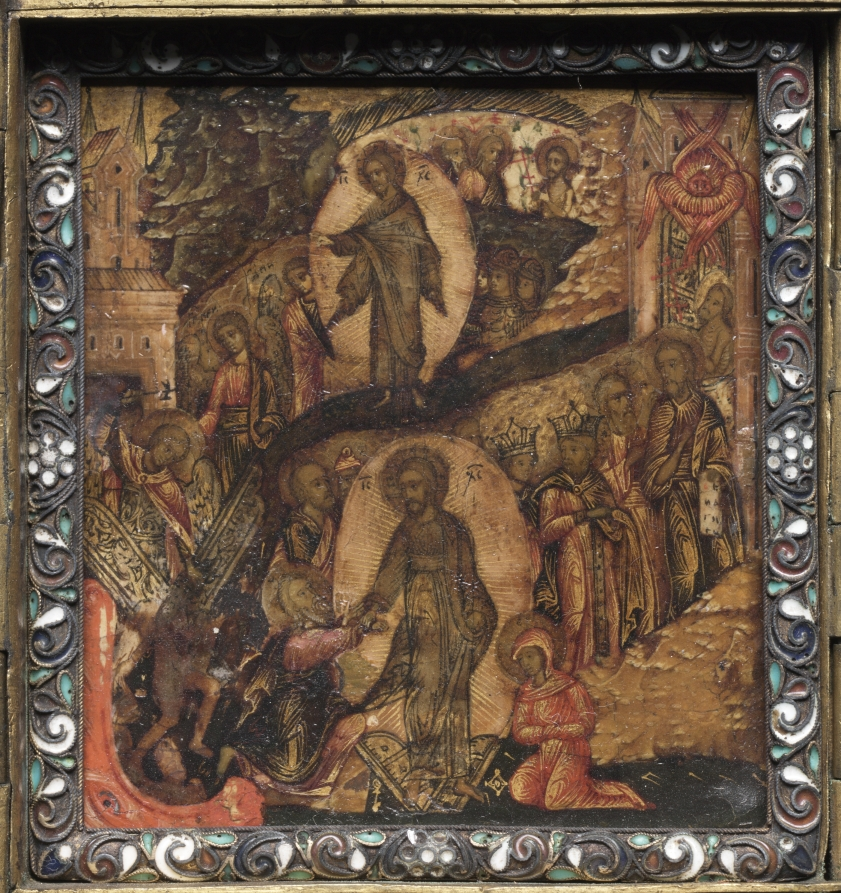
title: Portable Triptych Icon: The Resurrection and Anastasis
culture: Byzantium, Russia, Moscow?, Byzantine period, 17th century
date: 1600s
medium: painted wood panel within enameled brass frame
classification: Painting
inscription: Inscribed throughout in traditional Church Russian (Church Slavonic) with names of prophets, saints, etc. Engraved on the outside of the brass frame is a cross with the symbols of the Passion, inscribed (top to bottom): The King of Glory; Jesus Christ; Victor; Lance (with which Christ was speared); Stick (tipped with acid to aggravate the wound); the initials R, B, M, L, G, G, standing for various personages represented in the paintings; and at the lower center, the Russian letters GA ("Golova Adama": Head of Adam). A scrap of paper was found behind the center panel, but it is damaged and very difficult to read. Professor A. Dean McKenzie of the University of Oregon, who translated the numerous inscriptions and identified the iconography of the panels, likewise examined the writing on the paper scrap and in a letter of January 29, 1979, said that it refers to two brothers: Ivan Dmitrievich, one of the brothers, apparently presented this icon as a gift to his younger brother.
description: This triptych icon was probably commissioned by a lay person for private prayer and meditation. It could be folded and shut when not in use. The scenes represented from left to right are: The Crucifixion (left); The Resurrection and Anastasis (center); and Adoration of the Miracle-Working Icon of the Vladimir Mother of God (right). Small portable icons such as this were common to later Russian religious practice.